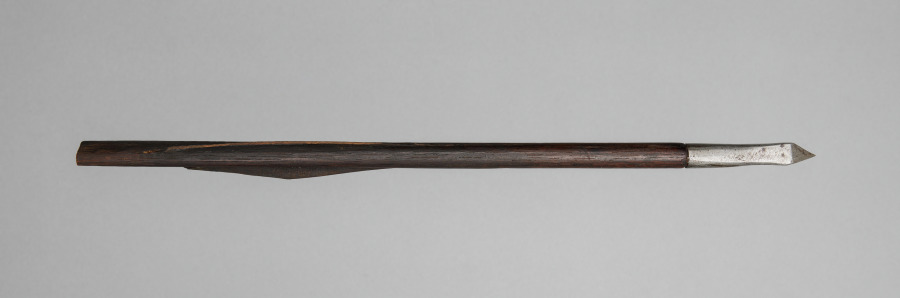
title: Crossbow Bolt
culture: Germany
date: 1500s-1600s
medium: wood, leather, steel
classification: Arms and Armor